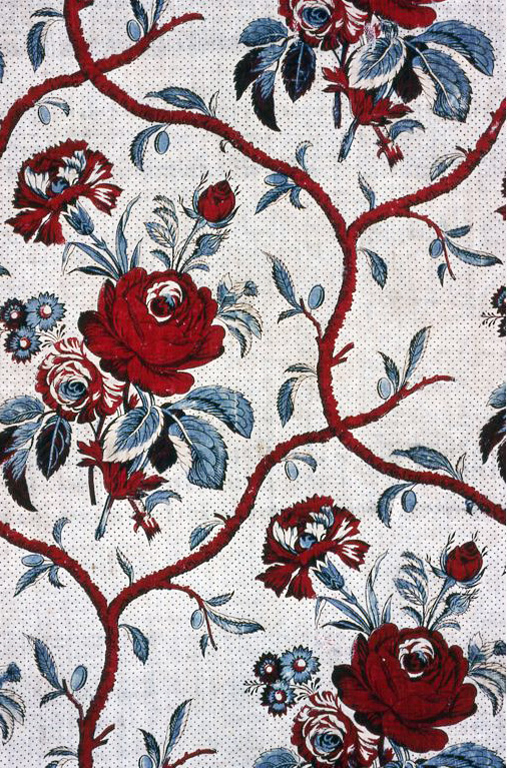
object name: Textile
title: Valance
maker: France, Nantes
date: c. 1788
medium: Cotton, plain weave; block printed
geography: Nantes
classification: textile; weaving - printed; weaving